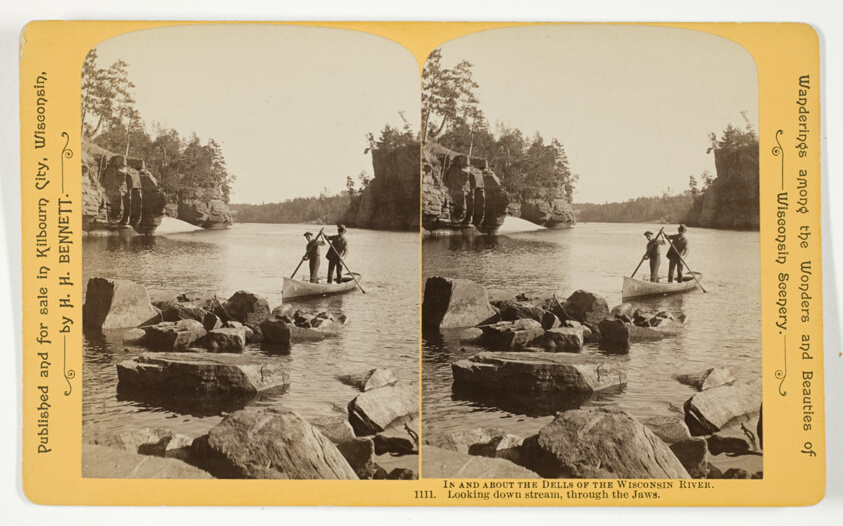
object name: Photograph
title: Looking down stream, through the Jaws, No. 1111 from the series "In and About the Dells of the Wisconsin River"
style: 19th century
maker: Henry Hamilton Bennett (American, born Canada, 1843-1908)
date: 1870/1908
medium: Albumen print, stereo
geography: Wisconsin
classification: photography; photograph; albumen silver print; stereograph (albumen)